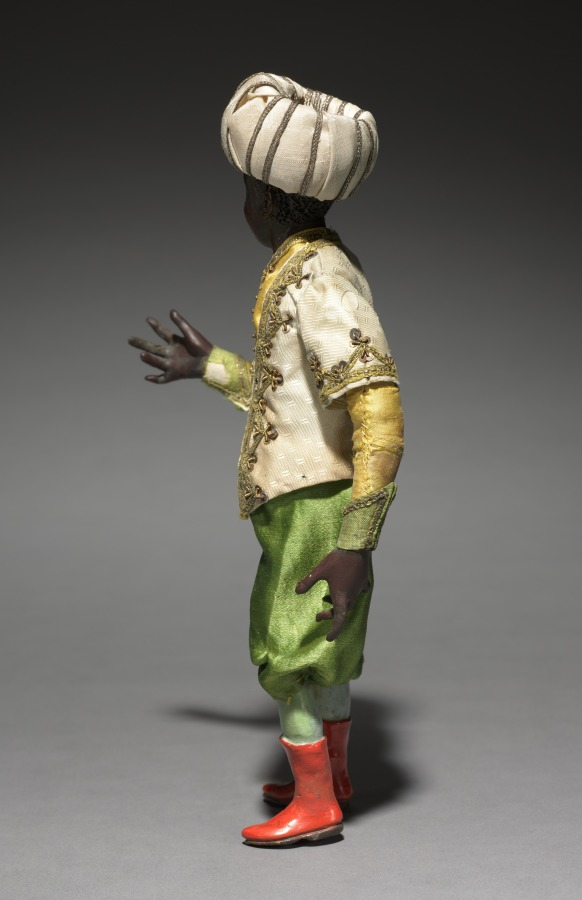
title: Figure from a Crèche: Attendant of the Magi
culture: Italy, Naples, late 18th-early 19th century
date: 1780–1830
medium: painted wood and terracotta with various textiles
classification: Sculpture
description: The practice of creating scenes of the Nativity for the home dates from the early 1700s in Italy, where people began to set up doll-like figures of about a foot or less in height. The custom was particularly popular in Naples around 1800, where crèche scenes (crèche means cradle, or crib) included many figures, whose heads and hands of painted terracotta, stuffed cloth bodies, and clothing adapted from contemporary local costumes gave them an amazingly realistic character. Representations of the birth of Jesus can be traced to the first few centuries of Christianity. Both living creatures and sculptural depictions of them were used from early times. By the late middle ages it was customary to create life-size figures of wood or stone, naturalistically painted, to represent the characters who participated in the events of Jesus's early life. These sculptures were then arranged in scenes illustrating one or both of the most important of these events, the Adoration of the Shepherds and the Adoration of the Magi-the three kings from the East who came to pay homage to the Christ child. Used in churches, these large figures were especially popular in Italy, Central Europe, Spain, and Portugal.